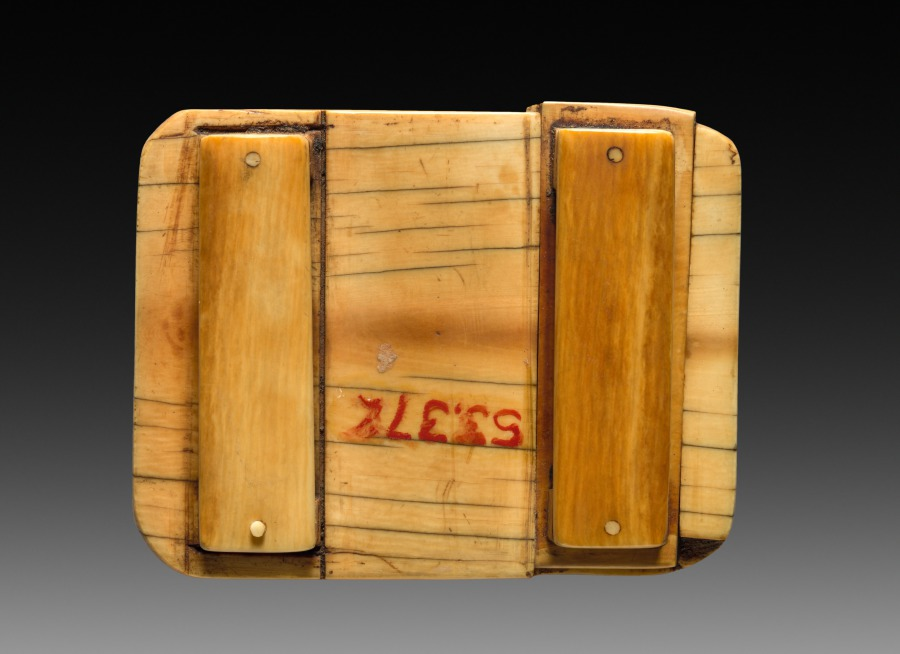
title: Buckle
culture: China, Qing dynasty (1644-1911)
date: 1700s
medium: ivory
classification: Ivory